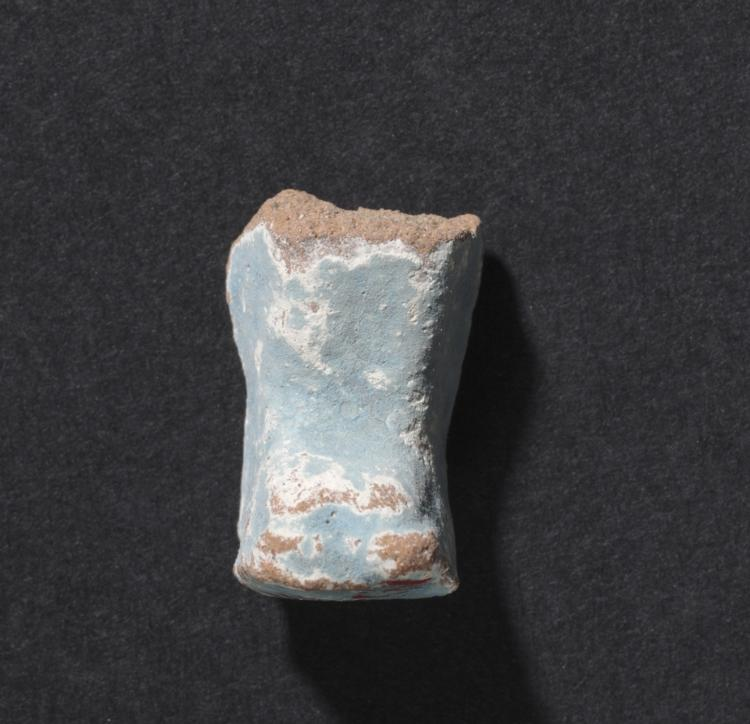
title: Shawabty of Ditamenpaankh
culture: Egypt, Late period (715–332 BCE), Dynasty 25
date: 715–656 BCE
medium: terracotta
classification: Funerary Equipment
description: High demand for shawabtys in the Late Period, a time when as many as 400 or more shawabtys were placed in the tomb with the deceased, gave rise to a specialized container for storing them: the shawabty box. This example is inscribed for the lady of the house, Ditamenpaankh, and was probably one of a pair originally made for her. The single-masted boat on the box's lid is perhaps an allusion to the pilgrimage of the deceased to the holy city of Abydos, the cult city of Osiris, king of the dead. The shawabtys inside are crude, mass-produced examples cast in an open mold. Made of terracotta, their blue paint imitates more costly shawabtys made of faience. As for the shawabty spell, it has been removed from its traditional location on the shawabty's front and relocated onto the sides of box, where it needed only to be written once, thus expediting production.